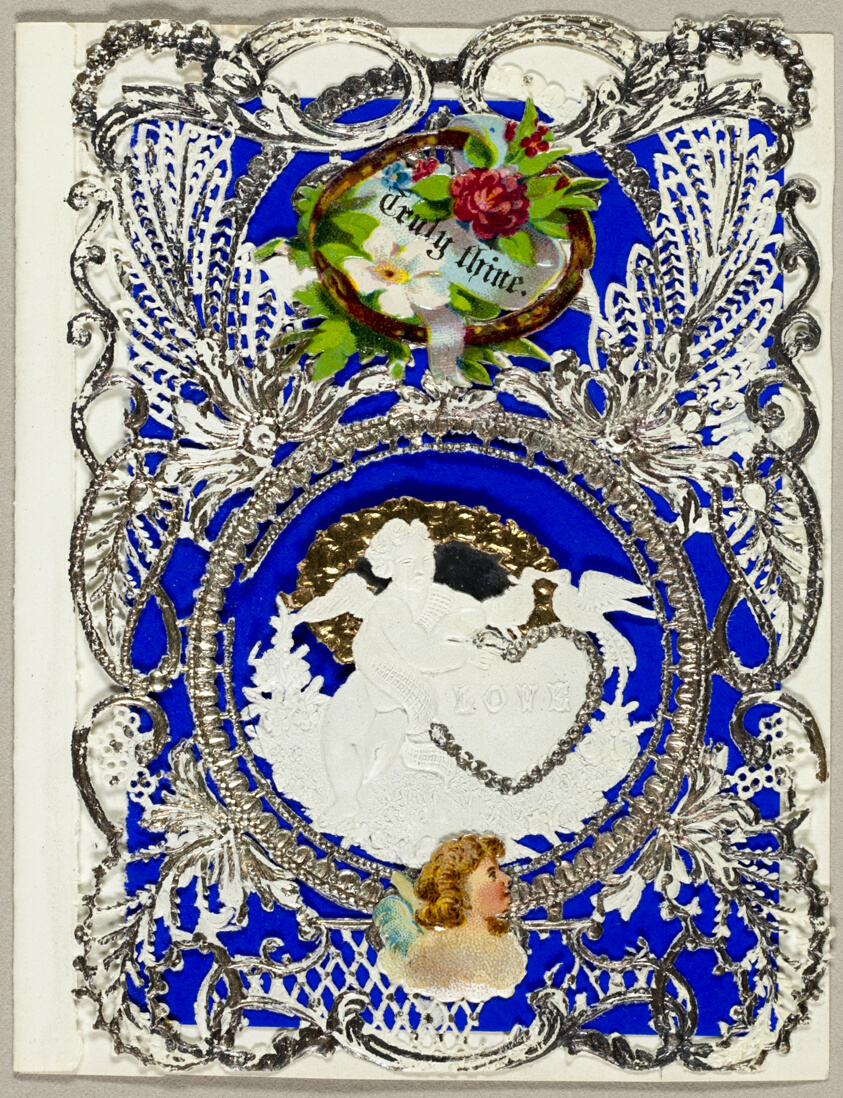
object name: Drawing and Watercolor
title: Truly Thine (valentine)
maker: John Windsor (English, 19th century)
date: c. 1860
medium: Collaged elements and silver paint on cut and embossed (designed) ivory wove paper with blue wove paper insert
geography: England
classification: collage; valentine; prints and drawing; paper